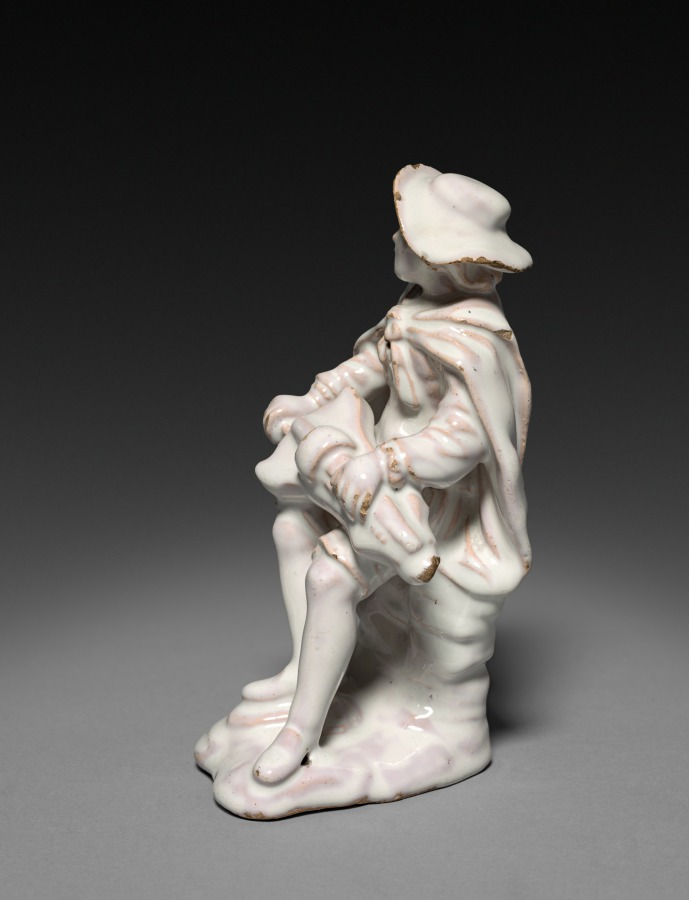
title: Seated Musician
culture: France, Strasbourg, 18th century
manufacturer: Strasbourg Factory (France)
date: c. 1740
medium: faience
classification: Ceramic